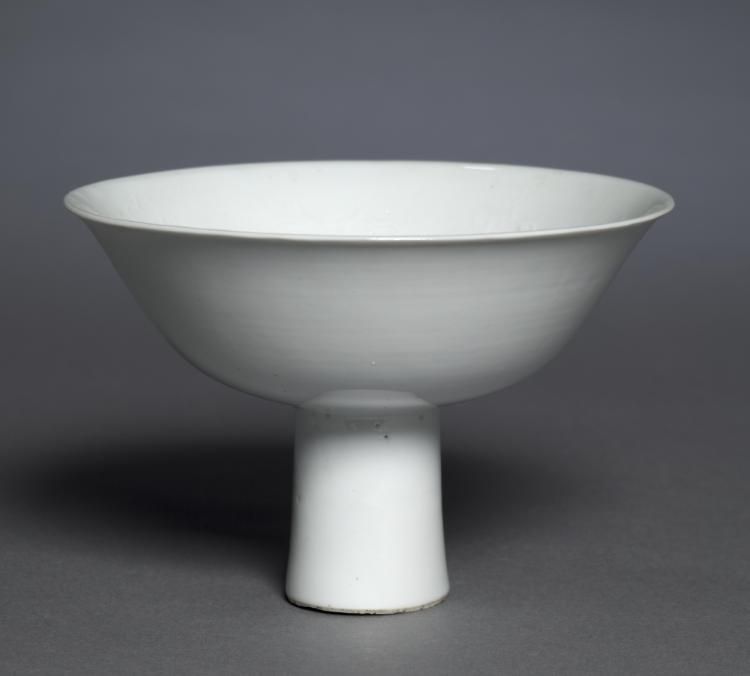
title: Stem Cup with Buddhist Emblems: Shufu Ware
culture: China, Jiangxi province, Yuan dynasty (1271-1368)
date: 1300s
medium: porcelain with molded decoration and white glaze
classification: Ceramic